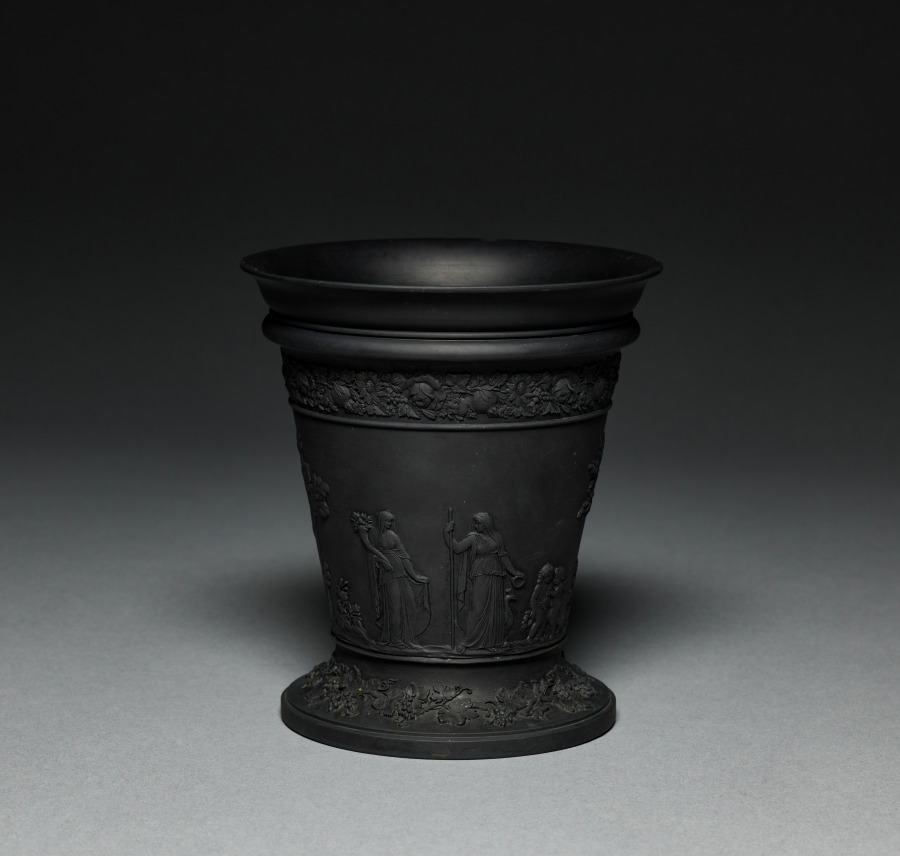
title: Jardiniere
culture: England, Staffordshire, 18th century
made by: Wedgwood Factory (British)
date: late 1700s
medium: black basalt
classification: Ceramic